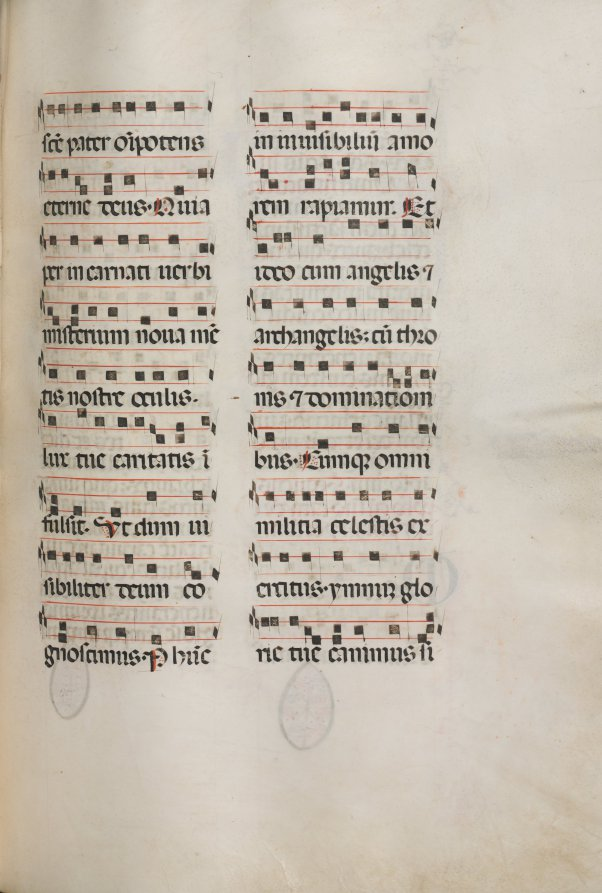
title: Missale: Fol. 177: Music for various ordinary prayers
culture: Italy, Perugia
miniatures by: Bartolommeo Caporali (Italian, c. 1420–1503)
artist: assisted by Giapeco Caporali (Italian, d. 1478)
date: 1469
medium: ink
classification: Bound Volume